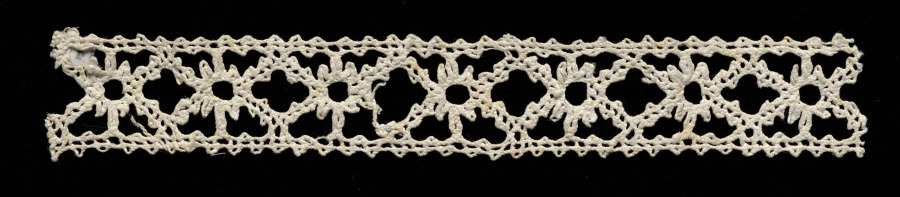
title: Lace Insertion (no selvage)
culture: Italy, Venice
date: 1540–60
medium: Bobbin lace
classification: Lace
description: The design of this lace fragment is similar to that found in lace trimmings made of gold, silver, and colored silk threads.